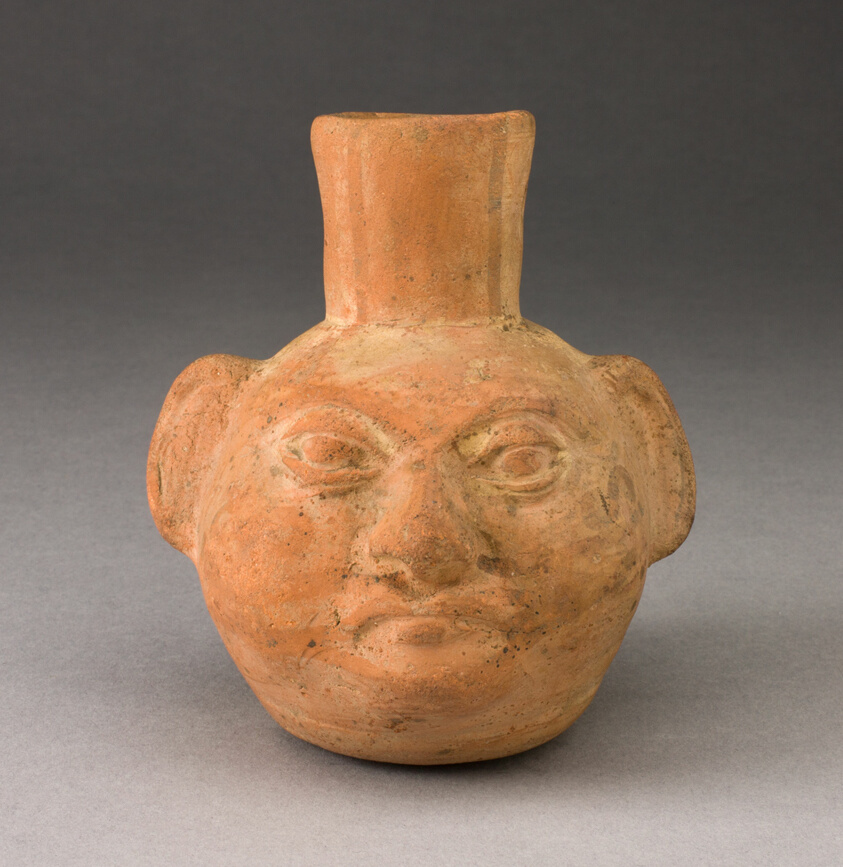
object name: Vessel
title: Miniature Portrait Jar of a Human Head with Face Painting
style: moche, mochica, early intermediate period, Pre-Columbian, americas, Arts of the Americas, andean, andes, south american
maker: Moche (North coast, Peru)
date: 100 BCE–500 CE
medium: Ceramic and pigment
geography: Peruvian North Coast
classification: earthenware; ceramics; vessel; art of the americas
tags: people, portraits